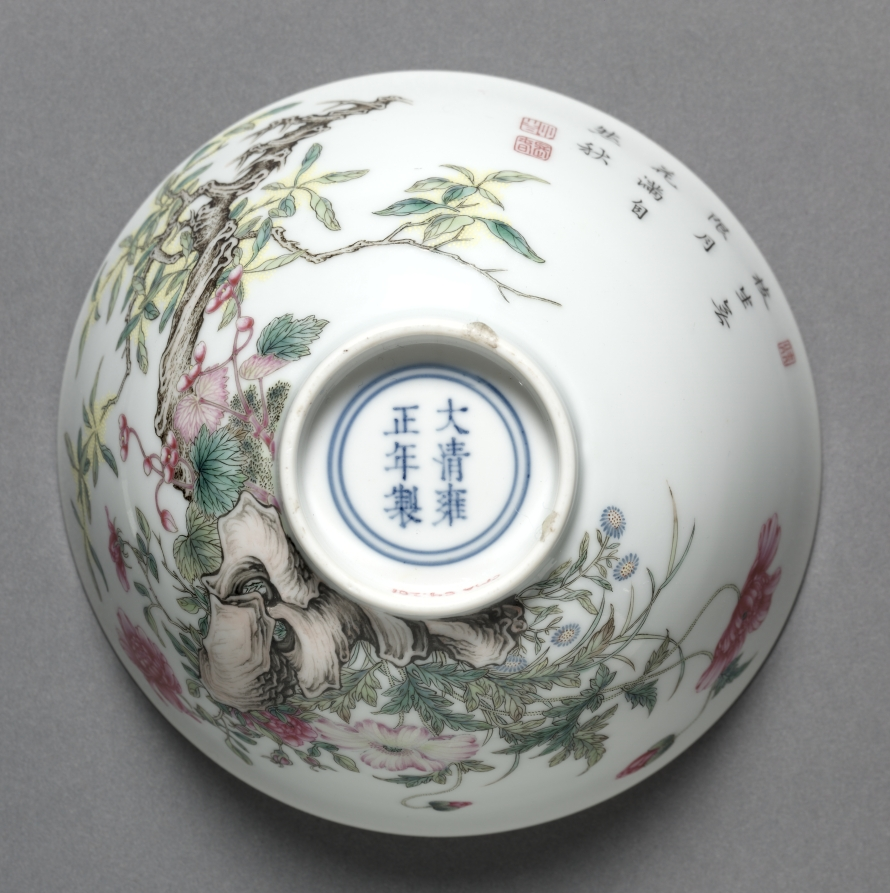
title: Bowl with Poppies, Tree Peony, and Flowering Mimosa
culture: China, Jiangxi province, Jingdezhen, Qing dynasty (1644-1911), Yongzheng mark and reign (1723-1735)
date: 1723–35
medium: porcelain with overglaze enamel decoration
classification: Ceramic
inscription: 大清雍正年制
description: Developments in enamel technology led to new possibilities in polychrome decoration. Pinks appeared, lending their name to the new palette of overglaze colors (famille rose), and the addition of opaque white allowed painters to vary the value of pigments, enhancing the painterly quality of porcelain decoration. As on painted scrolls and album leaves, the image is accompanied with a poem, in this case: "Branches come alive in the moonlight; Blossoms fill the autumn realms."